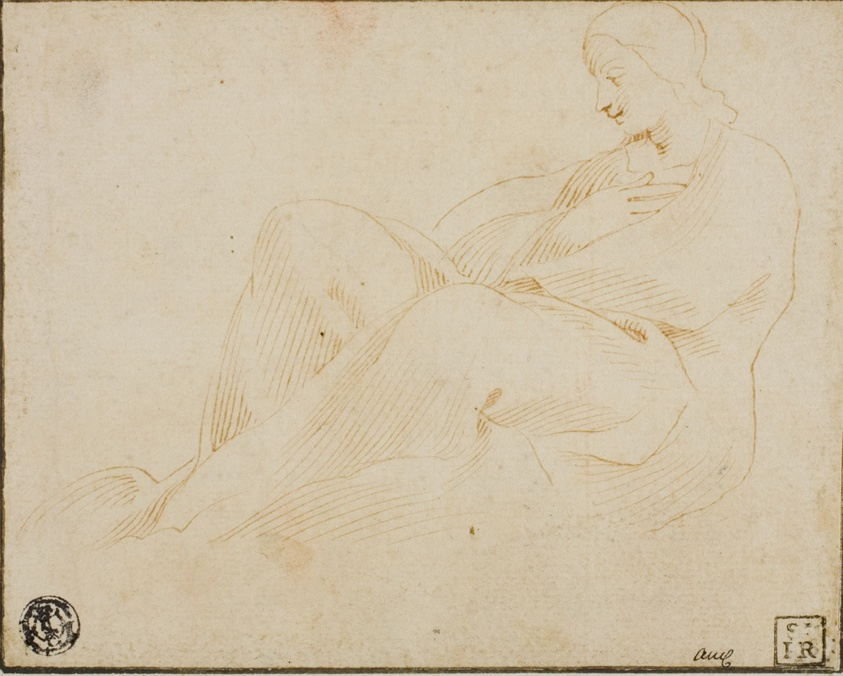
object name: Drawing and Watercolor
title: Seated Draped Woman in Profile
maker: After Ludovico Carracci; Italian, 1555-1619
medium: Pen and brown ink on cream laid paper, laid down on ivory wove card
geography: Italy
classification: pen and ink drawings; drawings (visual works); prints and drawing